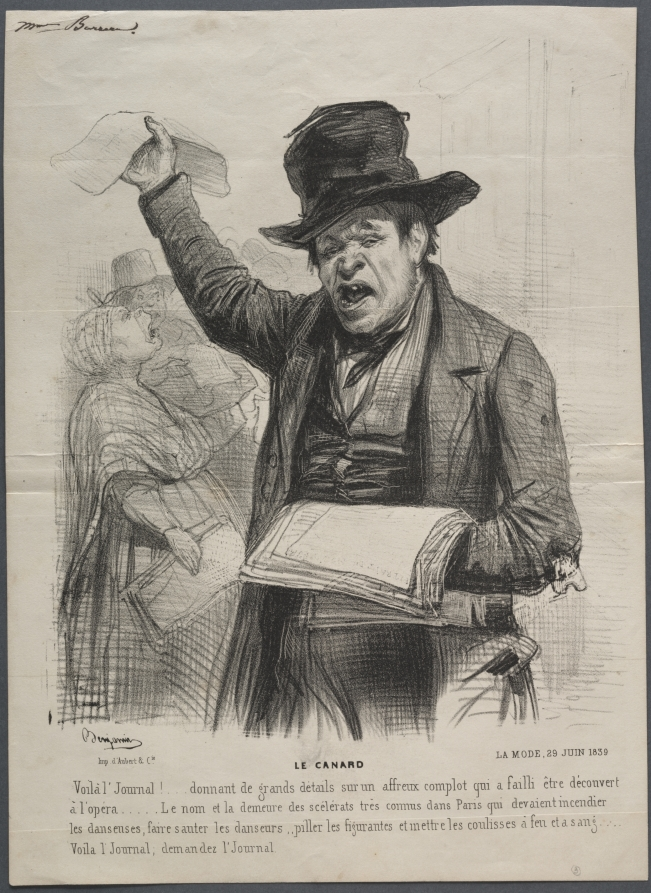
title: The Rag: Here is the daily newspaper!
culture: France, 19th century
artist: Benjamin (Benjamin Roubaud) (French, 1811–1847)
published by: Aubert & Cie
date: 1839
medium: lithograph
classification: Print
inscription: upper left, in brown ink: Mme Burrern [?] lower left, in stone: Benjamin Across bottom: Le Canard; La Mode, 29 Juin 1839; Voilà l'Journal!...donnant de grands details sur un affreux complot qui a falli être découvert à l'opéra...Le nom et la demeure des scélérats très connus dans Paris qui devaient incendier les danseuses, faire a auter les danseurs...piller les figurantes et mettre les coulisses à feu et a sang...Voilà l'Journal; demandez l'Journal.